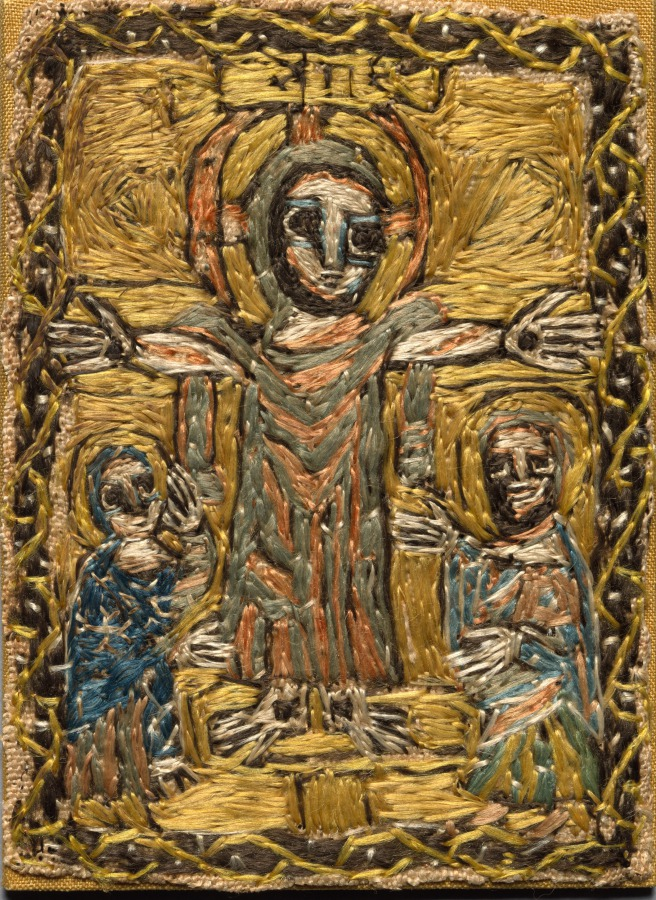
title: Fragment of a Clavus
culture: Egypt, Abbasid period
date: late 700s - early 800s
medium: embroidery on tabby weave: silk and linen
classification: Embroidery